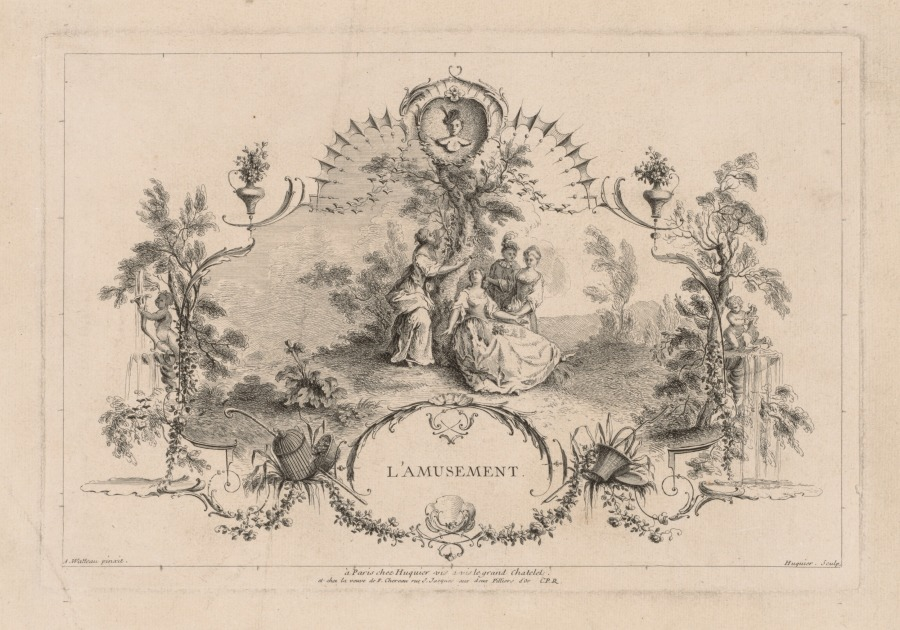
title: Amusement, Arabesque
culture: France, 18th century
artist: Gabriel Huquier (French, 1695–1772)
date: c. 1730–70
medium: engraving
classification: Print